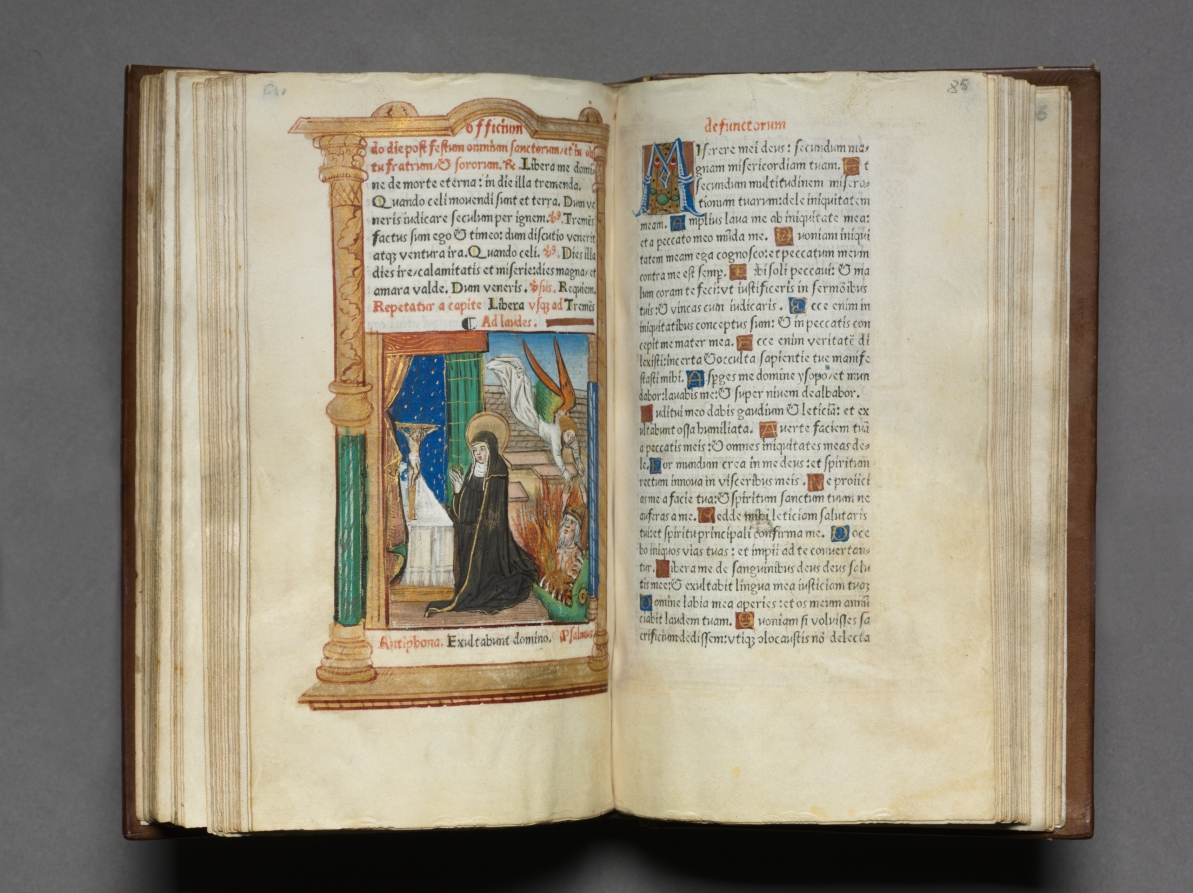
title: Printed Book of Hours (Use of Rome): fol. 85r, Dominican Nun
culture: France, Paris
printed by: Guillaume Le Rouge (French, Paris, active 1493–1517)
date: 1510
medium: 112 Printed folios on parchment, bound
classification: Bound Volume